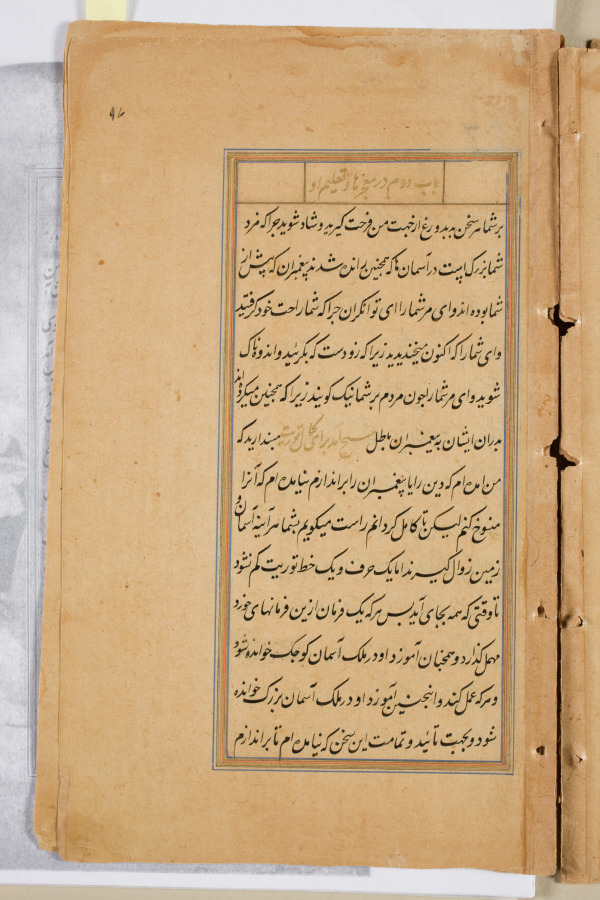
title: Text page from a Mirror of Holiness (Mir’at al-quds) of Father Jerome Xavier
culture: Mughal India, Allahabad, made for Prince Salim (1569–1627)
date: 1602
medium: Ink and gold on paper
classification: Manuscript